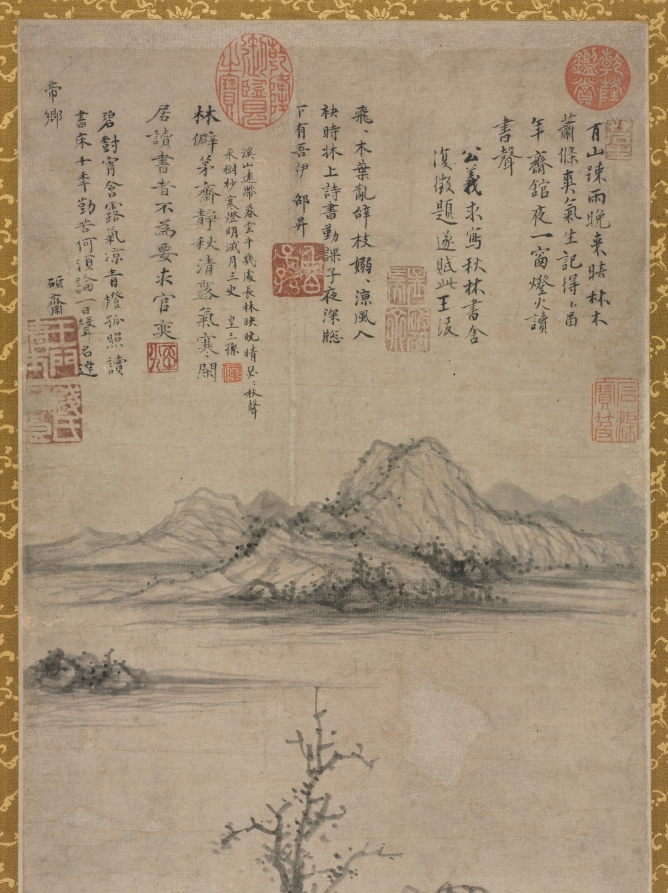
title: A Scholar's Retreat amid Autumn Trees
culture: China, Ming dynasty (1368–1644)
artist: Wang Fu (Chinese, 1362–1416)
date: c. 1403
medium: hanging scroll; ink on paper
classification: Painting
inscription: 青山疎雨晩來晴，林木蕭條爽氣生。/ 記得當年齋館夜，一窗燈火讀書聲。/ 公義求寫秋林書舍，復徵題，遂賦此。王紱 [印] 孟端; 友石生; 破研齋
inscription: 飛飛木葉亂辭枝，裊裊涼風入袂時。/ 床上詩書勤課子，夜深窗下有吾伊。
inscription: 林僻茅齋靜，秋清露氣寒。/ 閑居讀書者，不為要求官。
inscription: 碧樹宵含露氣涼，青燈孤照讀書床。/ 十年勤苦何須論，一日聲名達帝郷。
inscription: 溪山遠帶暮雲平，幾處長林映晩晴。/ 瑟瑟秋聲來樹杪，寒燈明滅月三更。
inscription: 5 seals of the Qianlong emperor (r. 1736-95); 1 seal of Tang Xun (dates unknown); 2 seals of He Zheng 何澂 (d. 1888); 3 seals of Cheng Qi 程琦 (1911–1988); 2 seals of Li Guochao 李國超 (20th century); 2 seals unidentified.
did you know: Wang Fu painted this going-away present and 3 friends added poems wishing the best for their departing friend Gongyi.